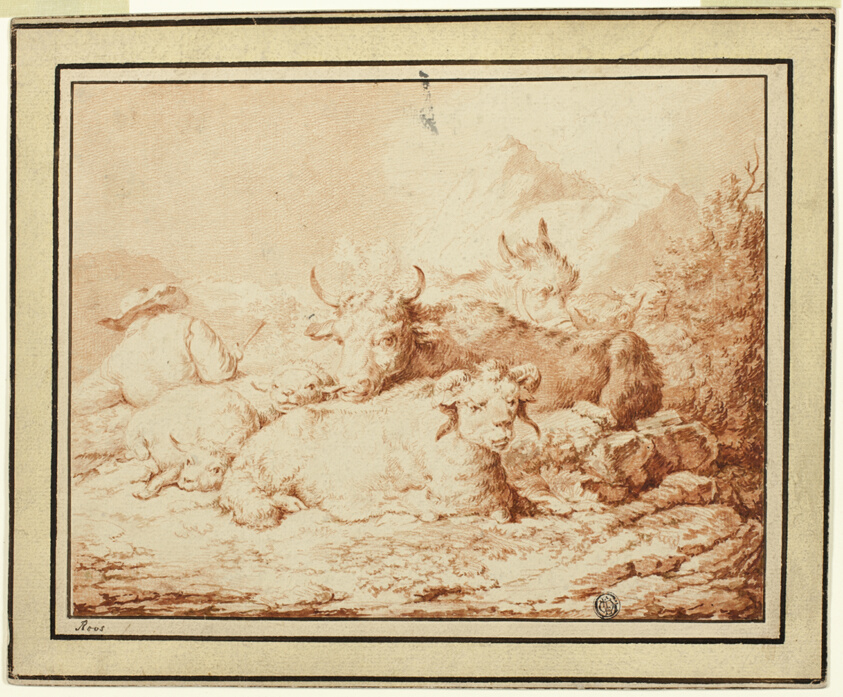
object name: Drawing and Watercolor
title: Cattle and Sheep with Herdsman in Rocky Landscape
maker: Johann Heinrich Roos (German, 1631-1685)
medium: Red chalk, with brush and red-brown wash, on ivory laid paper, laid down on cream laid card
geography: Germany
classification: chalk; drawings (visual works); prints and drawing